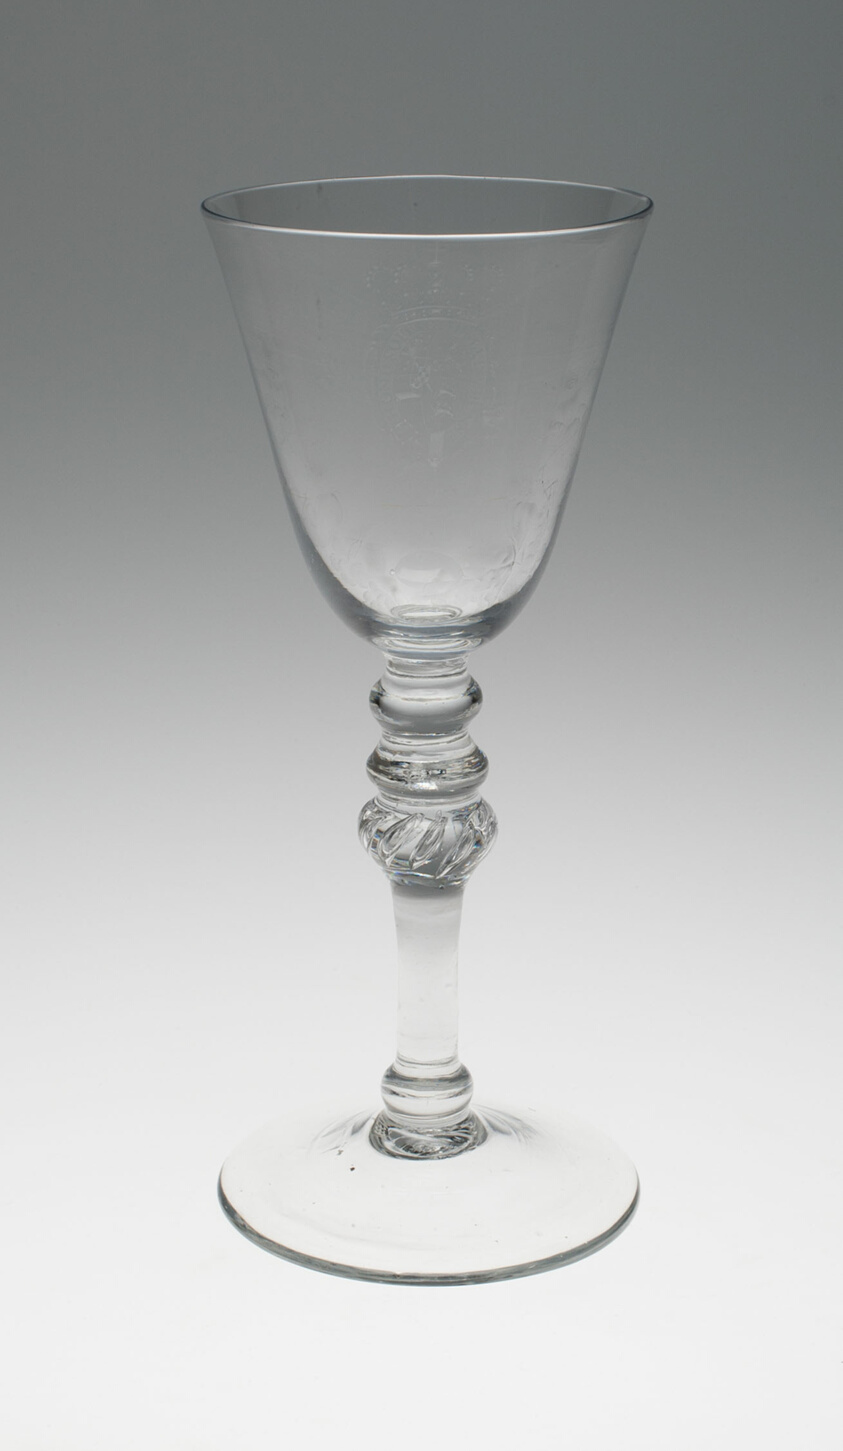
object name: Glass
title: Wine Glass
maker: England or Netherlands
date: c. 1750/70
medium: Glass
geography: England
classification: drinking vessel; glass; european decorative arts